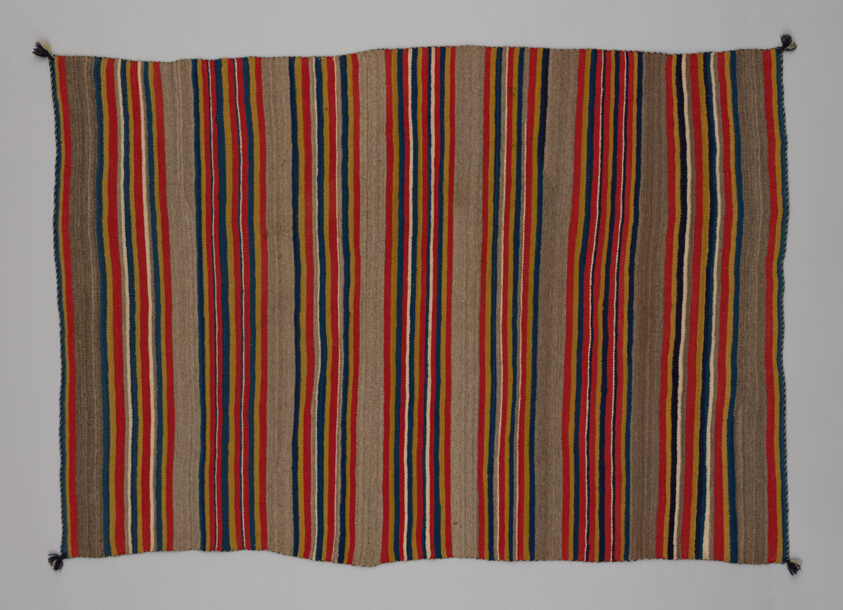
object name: Textile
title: Wearing Blanket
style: navajo, dine, Arts of the Americas, 19th century, indigenous, southwest, north american, native american, native north american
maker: Navajo (Diné) (Arizona, New Mexico, and Utah, United States)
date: 1860-90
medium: Wool, plain weave with "lazy lines" and dovetail tapestry weave; twined warp ends and selvages; knotted corner tassels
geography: New Mexico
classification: textile; wearing blanket; wool; art of the americas; clothing; garment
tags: stripes, geometric